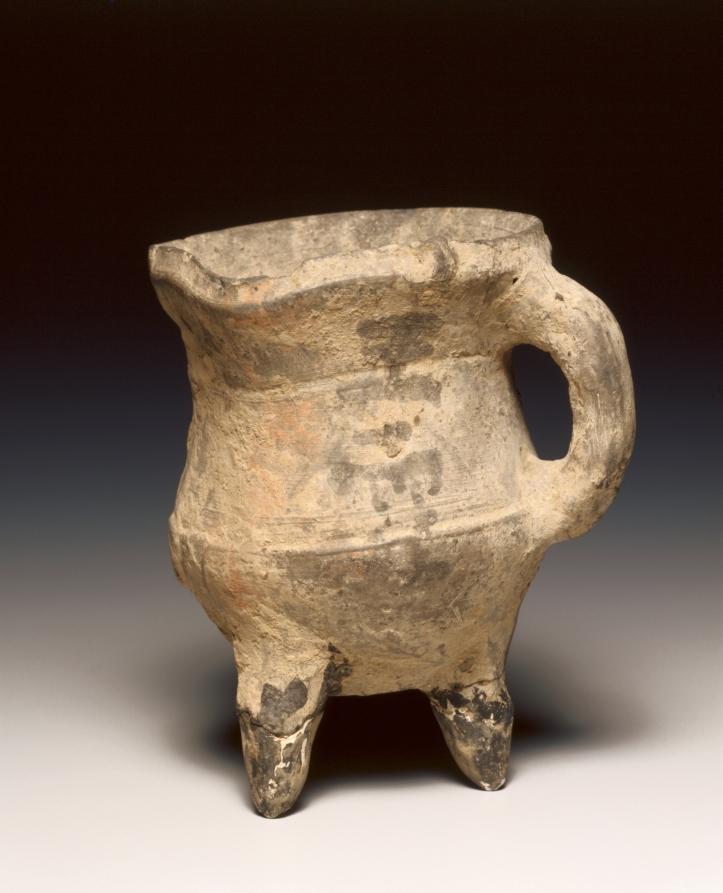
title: Wine Warmer (Jue)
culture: China, Shang dynasty (c. 1600–c. 1046 BCE), Anyang phase (c. 1250–1046 BCE)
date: c. 1300–1023 BCE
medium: pottery, tripod vessel with loop handle and rudimentary bowstring decoration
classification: Ceramic